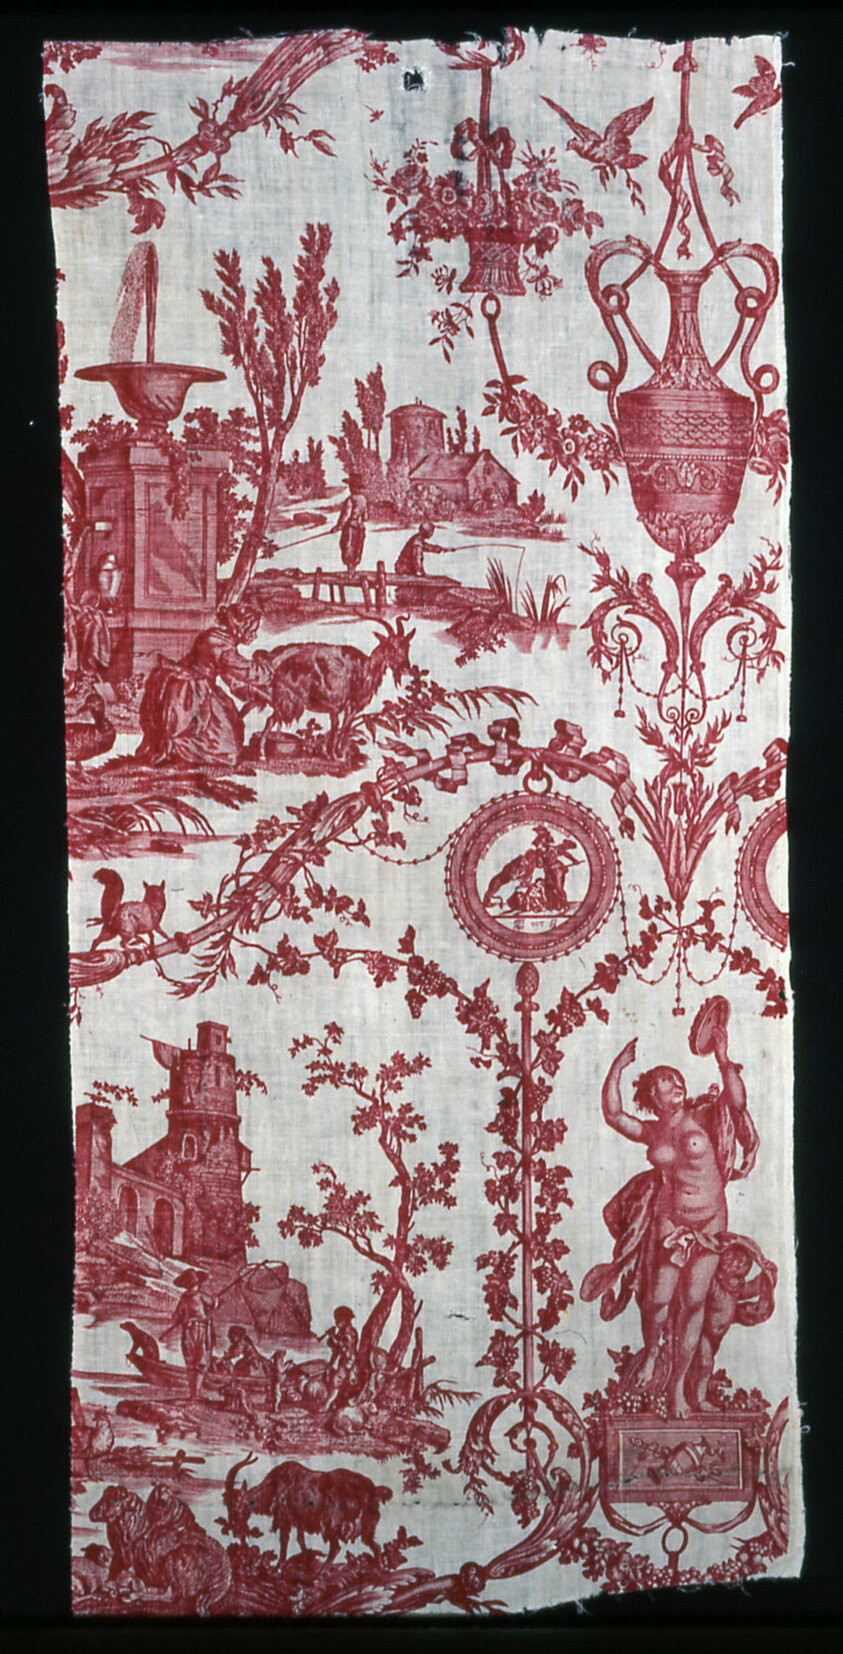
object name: Textile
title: La Liberté Americaine (American Liberty) (Furnishing Fabric)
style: jouy-en-Josas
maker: Designed by Jean Baptiste Huet (French, 1745–1811) after medallions engraved by Augustin Dupré (French, 1748–1833) after others; Manufactured by Christophe-Philippe Oberkampf (naturalized French, 1738-1815), Oberkampf Manufactory (French, 1760-1843); Jouy-en-Josas, France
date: 1783/89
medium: Cotton, plain weave; copperplate printed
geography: Jouy-en-Josas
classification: weaving - printed; textile; furnishing textile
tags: medallions, animals, white (color), vines, red (color), France, propaganda